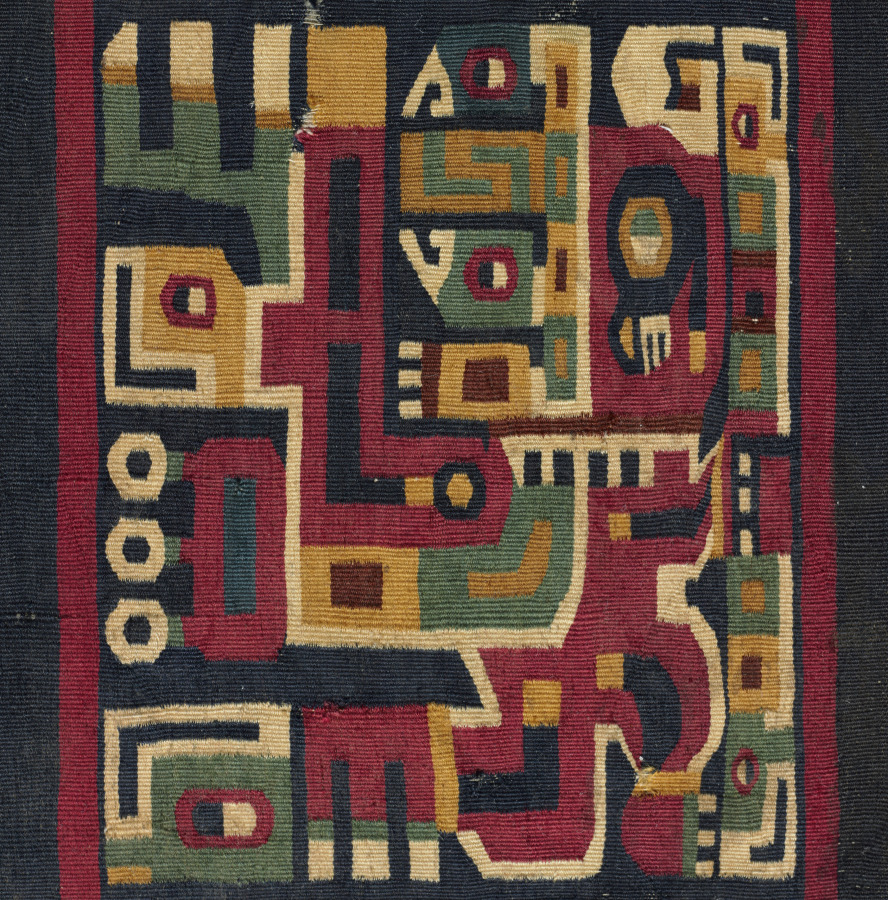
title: Tunic Fragments with Bird-Headed Creature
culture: Central Andes, Middle Horizon, Wari, 6th-11th century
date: 600–1000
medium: Camelid fiber, cotton; tapestry weave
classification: Textile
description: The bird-headed creature in profile that repeats in each of this tunic's design fields gazes upward, holds a staff of authority in front of its body, and wears an ornate headdress behind which a three-feathered wing can be seen. The extremely high technical quality of such tunics suggests that the Wari reserved bird imagery for their most exalted rulers. Here, the original incorporated more than twice as much yarn as the routine--some 19 miles, all handmade and much dyed an inky, dark blue, the most prestigious of Wari colors.